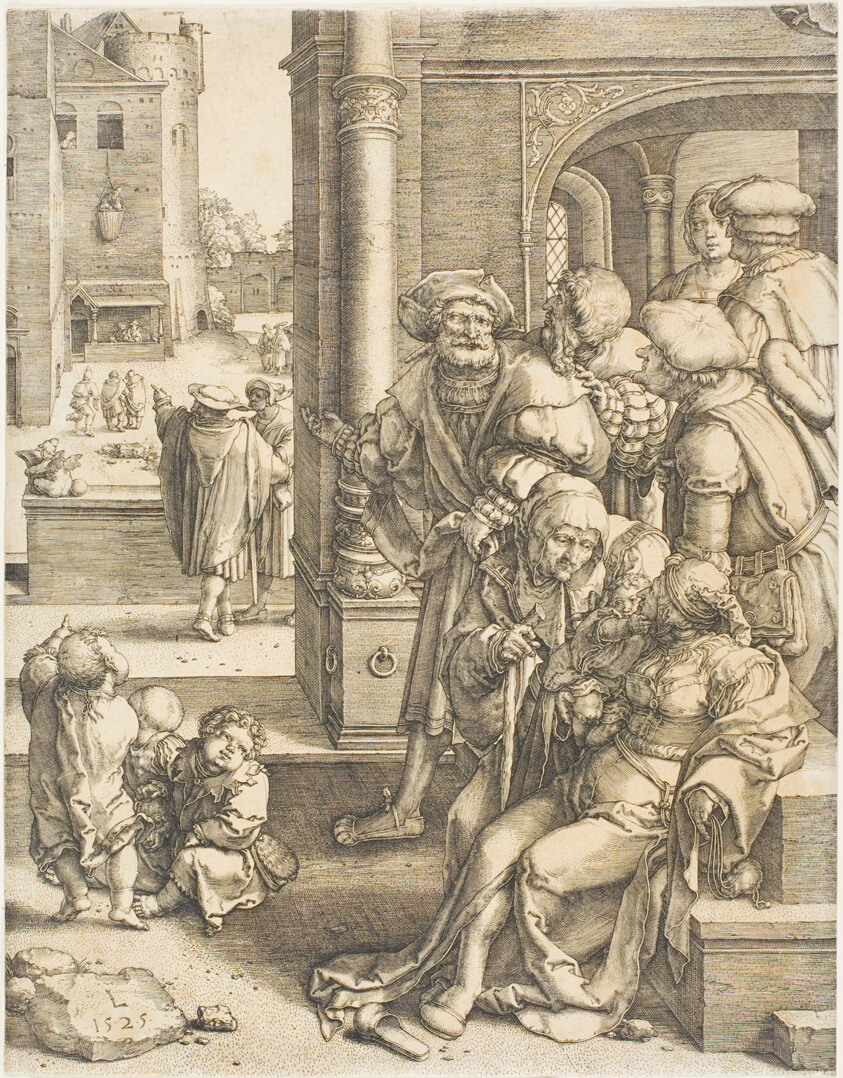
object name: Print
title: The Poet Virgil Suspended in a Basket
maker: Lucas van Leyden (Netherlandish, c. 1494-1533)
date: 1525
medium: Engraving in black on cream laid paper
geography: Netherlands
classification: engraving; print; prints and drawing